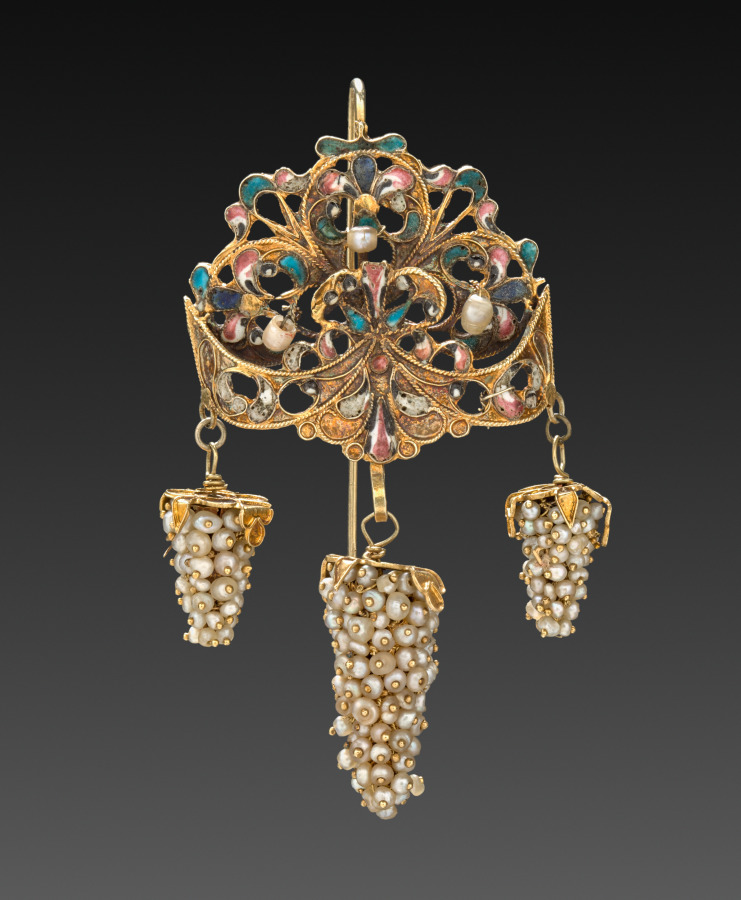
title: Earring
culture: Italy, Naples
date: 1700s–1800s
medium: gold and enamel with pearls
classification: Jewelry